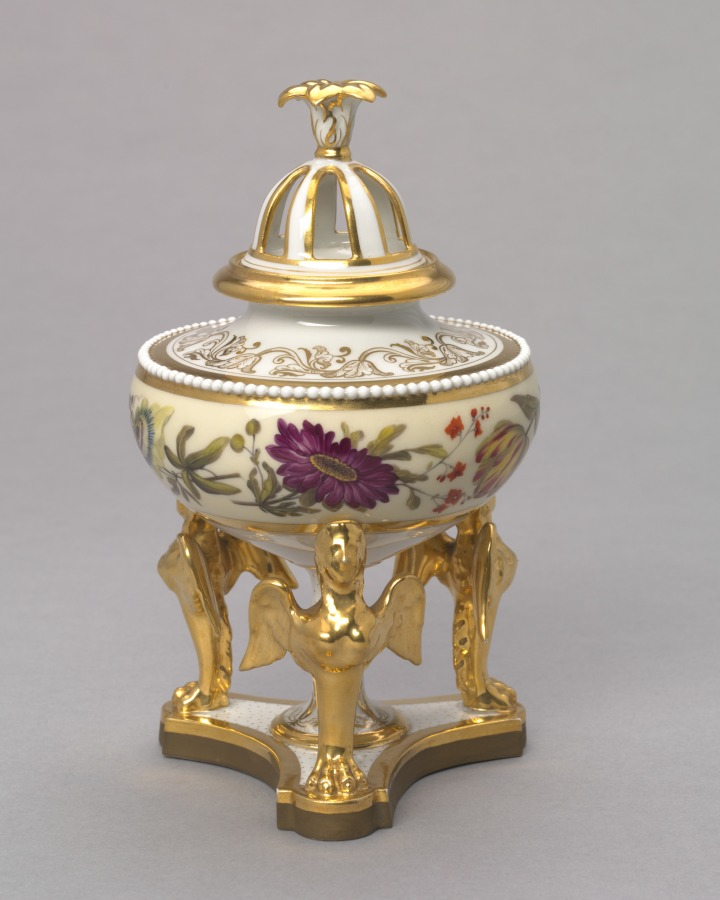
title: Urn and cover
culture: England, Worcester, 19th century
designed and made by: Flight, Barr and Barr (British)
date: c. 1815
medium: artificial porcelain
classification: Ceramic